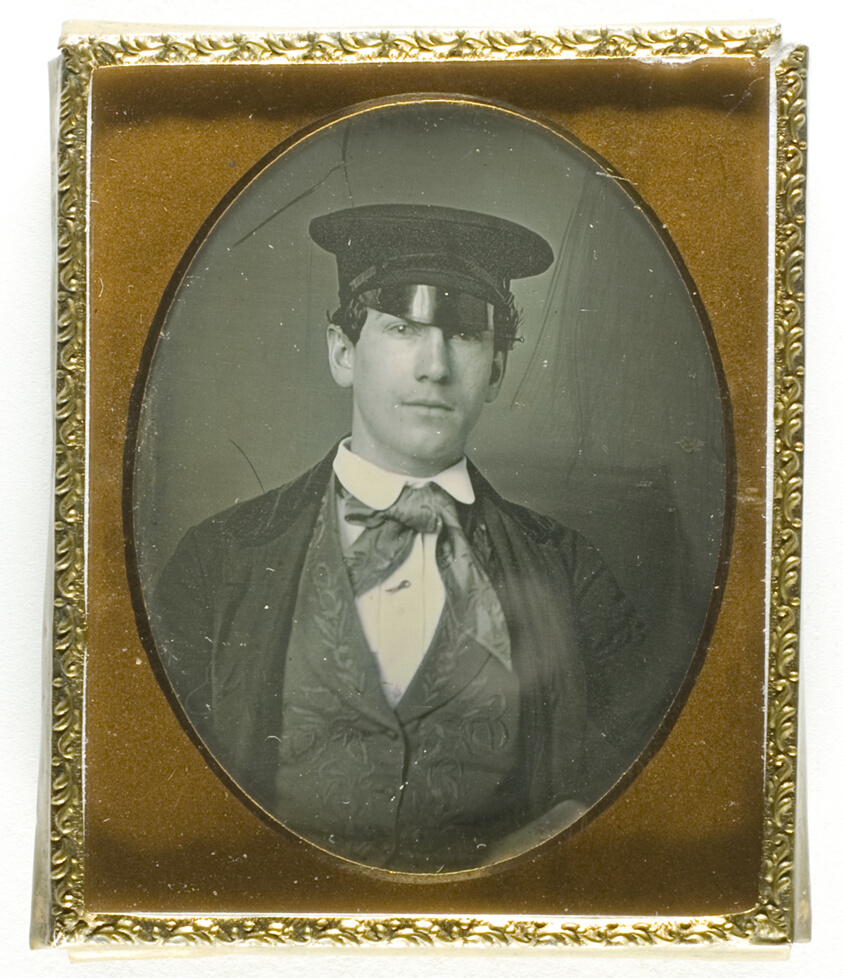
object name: Photograph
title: Untitled (Young Man with Hat)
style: 19th century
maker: Artist unknown; Probably American, 19th century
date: 1839/60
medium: Daguerreotype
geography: United States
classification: photographic process; photography; photograph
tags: Collected by Hugh Edwards